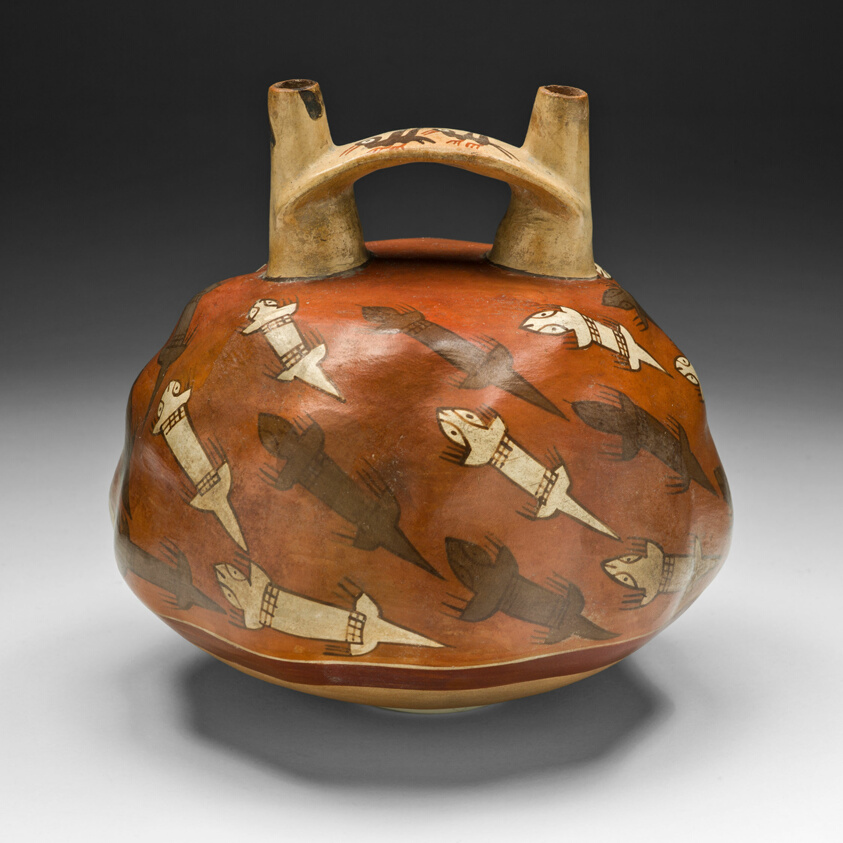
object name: Vessel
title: Vessel with Lizards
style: nazca, early intermediate period, Pre-Columbian, americas, andes, Arts of the Americas, andean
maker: Nazca; South coast, Peru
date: 180 BCE–500 CE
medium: Ceramic and pigment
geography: Peruvian South Coast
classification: ceramics; earthenware; art of the americas; vessel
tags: landscapes, animals, birds, lizards